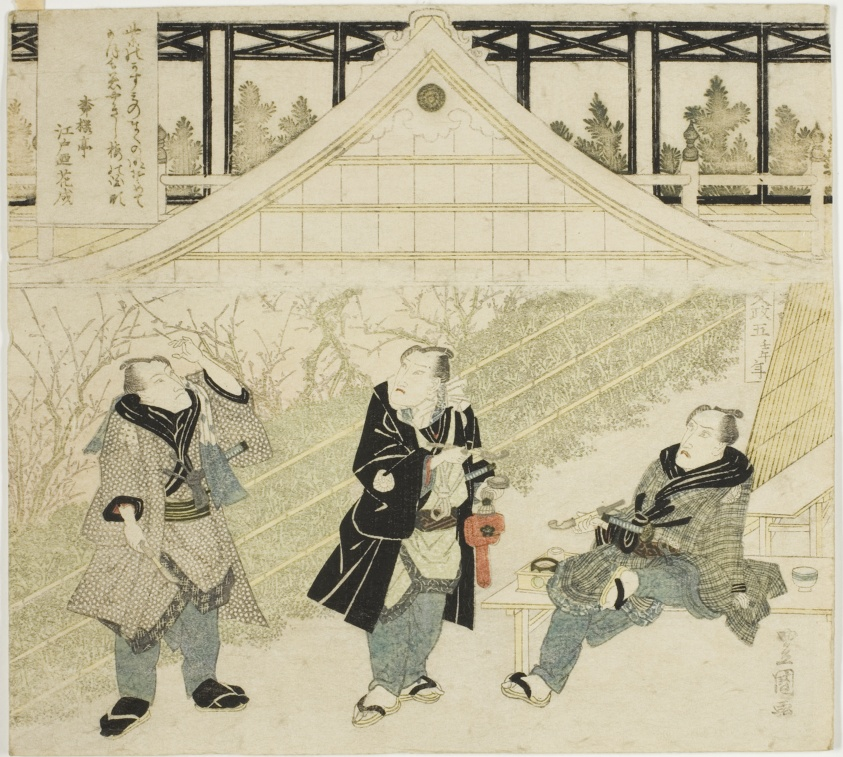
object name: Print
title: The actors Seki Sanjuro II, One Kikugoro III, and Ichikawa Danjuro VII on a Kabuki stage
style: Japanese (culture or style)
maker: Utagawa Toyokuni I 初代 歌川 豊国; Japanese, 1769–1825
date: 1822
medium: Color woodblock print; shikishiban, surimono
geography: Japan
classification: woodblock print; print; asian art